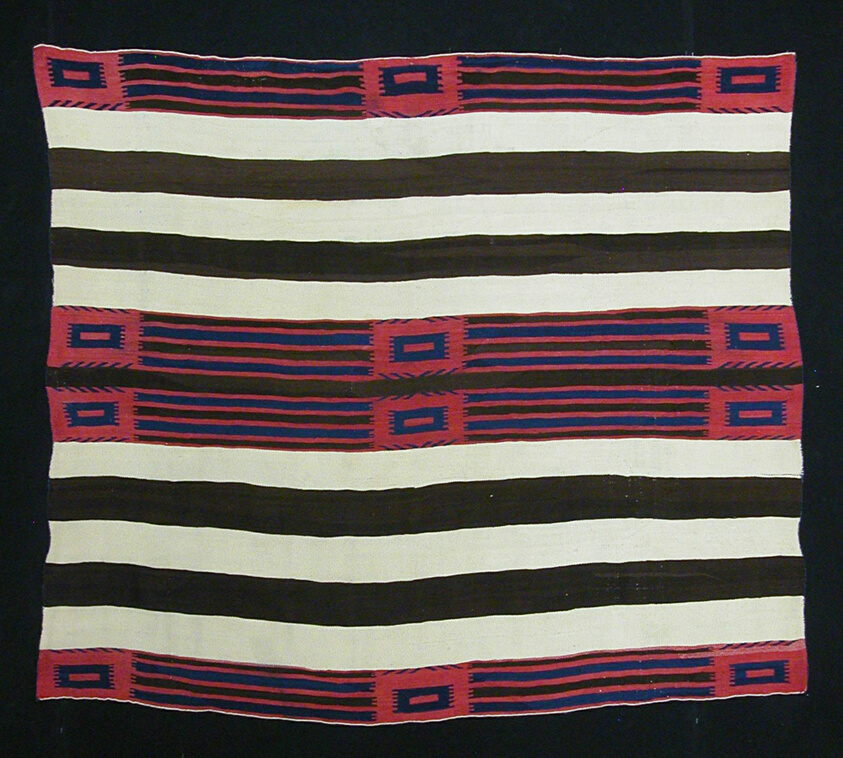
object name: Costume and Accessories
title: Wearing Blanket (Phase II)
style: navajo, americas, dine, 19th century, Arts of the Americas, indigenous, southwest, native american, north american, native north american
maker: Navajo (Diné) (Arizona, New Mexico, and Utah, United States)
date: 1850-65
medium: Wool; single interlocking tapestry weave; twined edges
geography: Navajo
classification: textile; blanket (covering); costume; garment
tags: geometric, arrow, squares, stripes